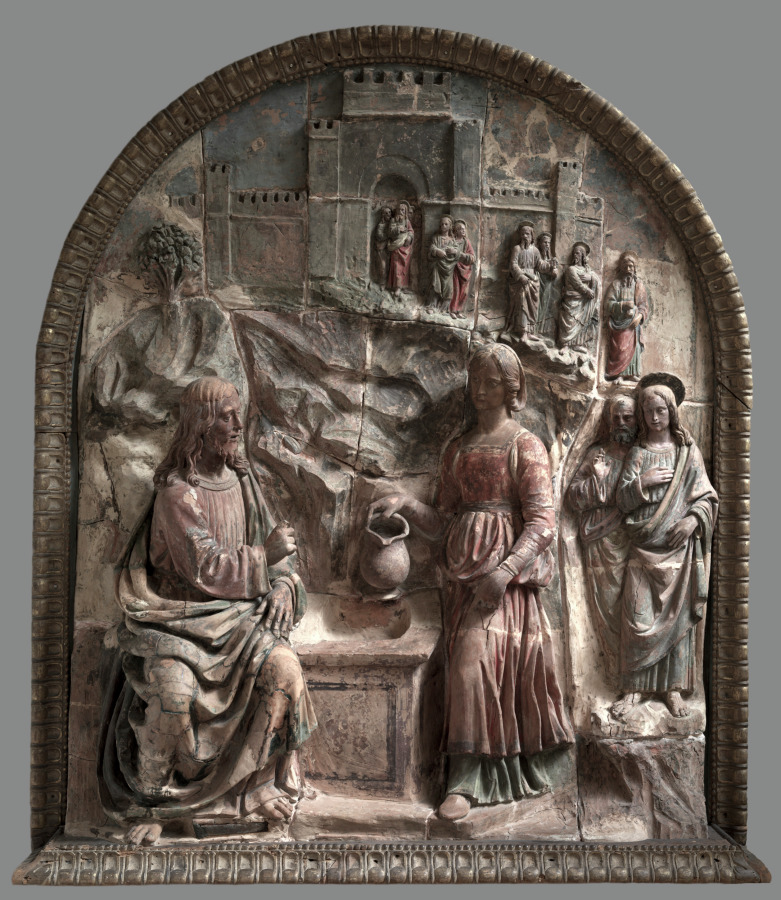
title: Christ and the Samaritan Woman at the Well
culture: Italy, Tuscany, Florence, 16th century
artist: workshop of Giovanni della Robbia (Italian, 1469–1529/30)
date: c. 1500–1530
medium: polychromed terracotta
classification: Sculpture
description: This sculptural relief belongs to a large series made for the Franciscan friary of San Vivaldo (founded 1350) in the Tuscan hills southwest of Florence. The friary was enlarged between 1500 and 1530 when 32 chapels were built, each dedicated to an incident in the life or Passion of Christ. San Vivaldo became a recognized pilgrimage site thematically linked to the holy sites of Jerusalem. Each single chapel at San Vivaldo was embellished with colorful terracotta sculptures produced by the Della Robbia workshop in Florence. This relief representing Christ and the Samaritan Woman was originally installed within the Chapel of the Samaritan Women. Over time the chapel fell into disrepair and eventually became the friar's wash house. The sculpture was sold by the friary in the early 1900s to fund repairs to the various chapels. The fine modeling of the heads of Christ and the Apostles and of the landscape masses gives an indication of the original quality of this badly damaged relief sculpture. The animation of the faces and complexity of the composition suggest that it was made under the supervision of Giovanni rather than by some lesser member of the Della Robbia workshop.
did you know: The Samaritan woman’s bust was replaced by a reproduction before entering the museum’s collection.